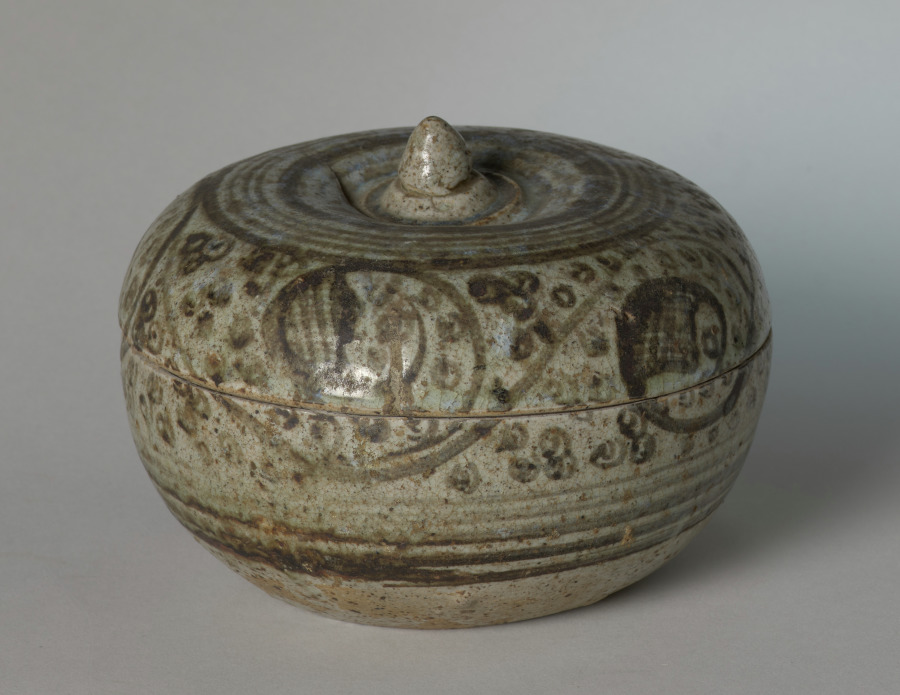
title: Covered Bowl with Painted Decoration with Lid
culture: Siam, Sawankhalok ware, 15th century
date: 1400s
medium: stoneware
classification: Ceramic